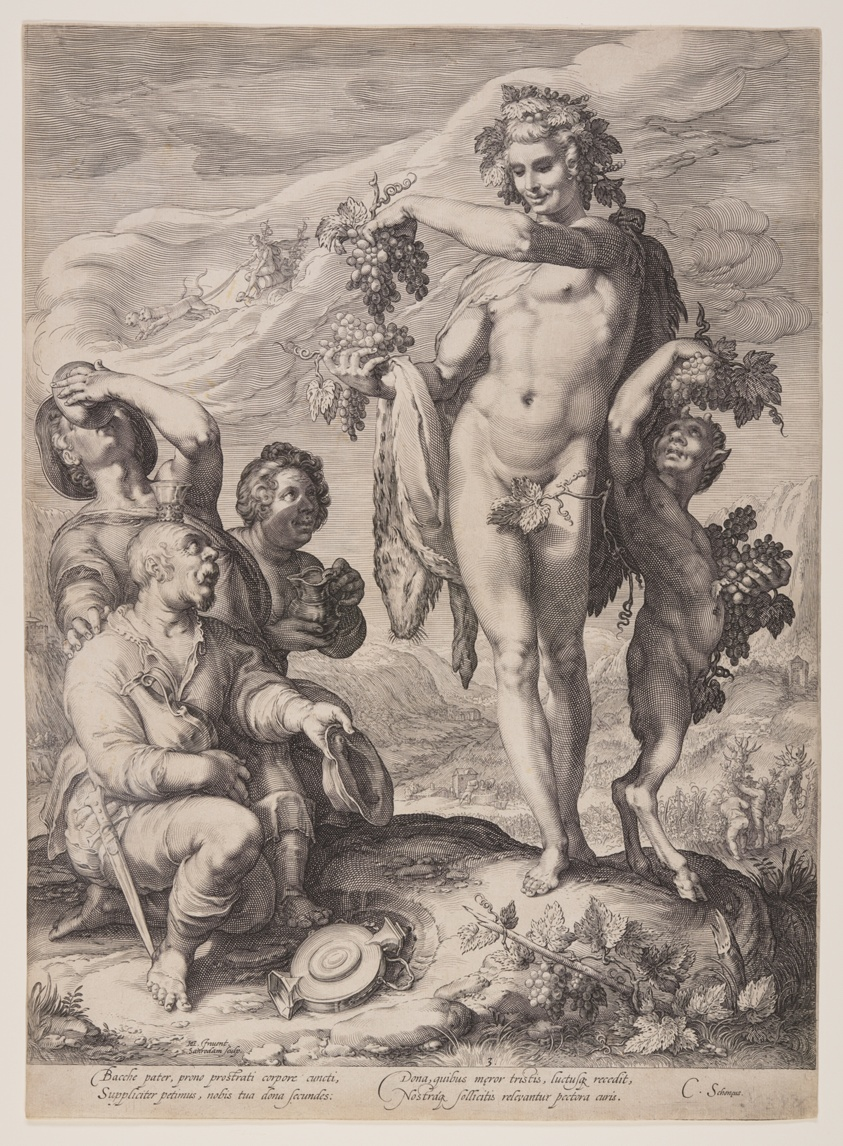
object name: Print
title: Homage Paid to Bacchus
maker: Jan Saenredam (Dutch, 1565–1607); after Hendrick Goltzius (Dutch, 1558–1617)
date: 1596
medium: Engraving on ivory laid paper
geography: Netherlands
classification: engraving; paper; print; prints and drawing